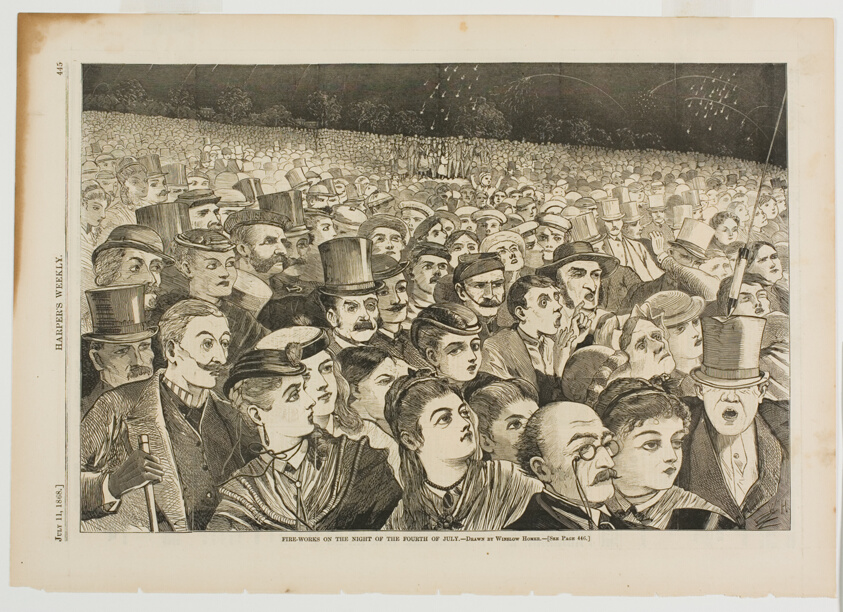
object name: Print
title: Fire Works on the Night of the Fourth of July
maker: Winslow Homer (American, 1836-1910); published by Harper's Weekly (American, 1857-1916)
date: published July 11, 1868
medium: Wood engraving on paper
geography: United States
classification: wood engraving; print; prints and drawing